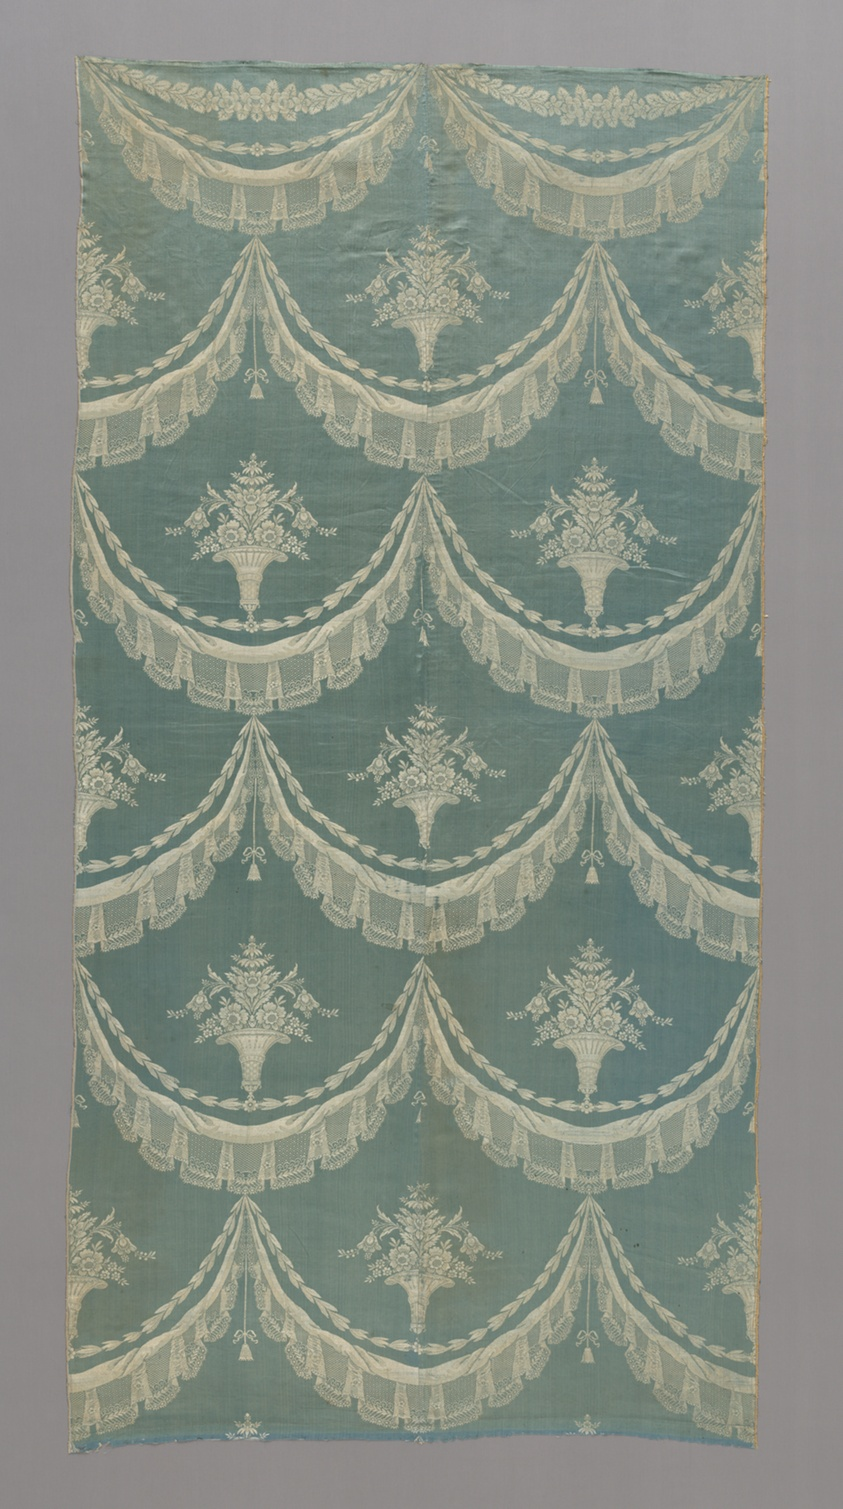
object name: Textile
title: Panel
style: louis xvi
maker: France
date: 1775/1800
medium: Silk, warp-float faced satin weave with supplementary patterning wefts tied by supplementary binding warps in plain and twill interlacings (lampas); two loom widths joined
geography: France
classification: textile; weaving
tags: lace, flowers